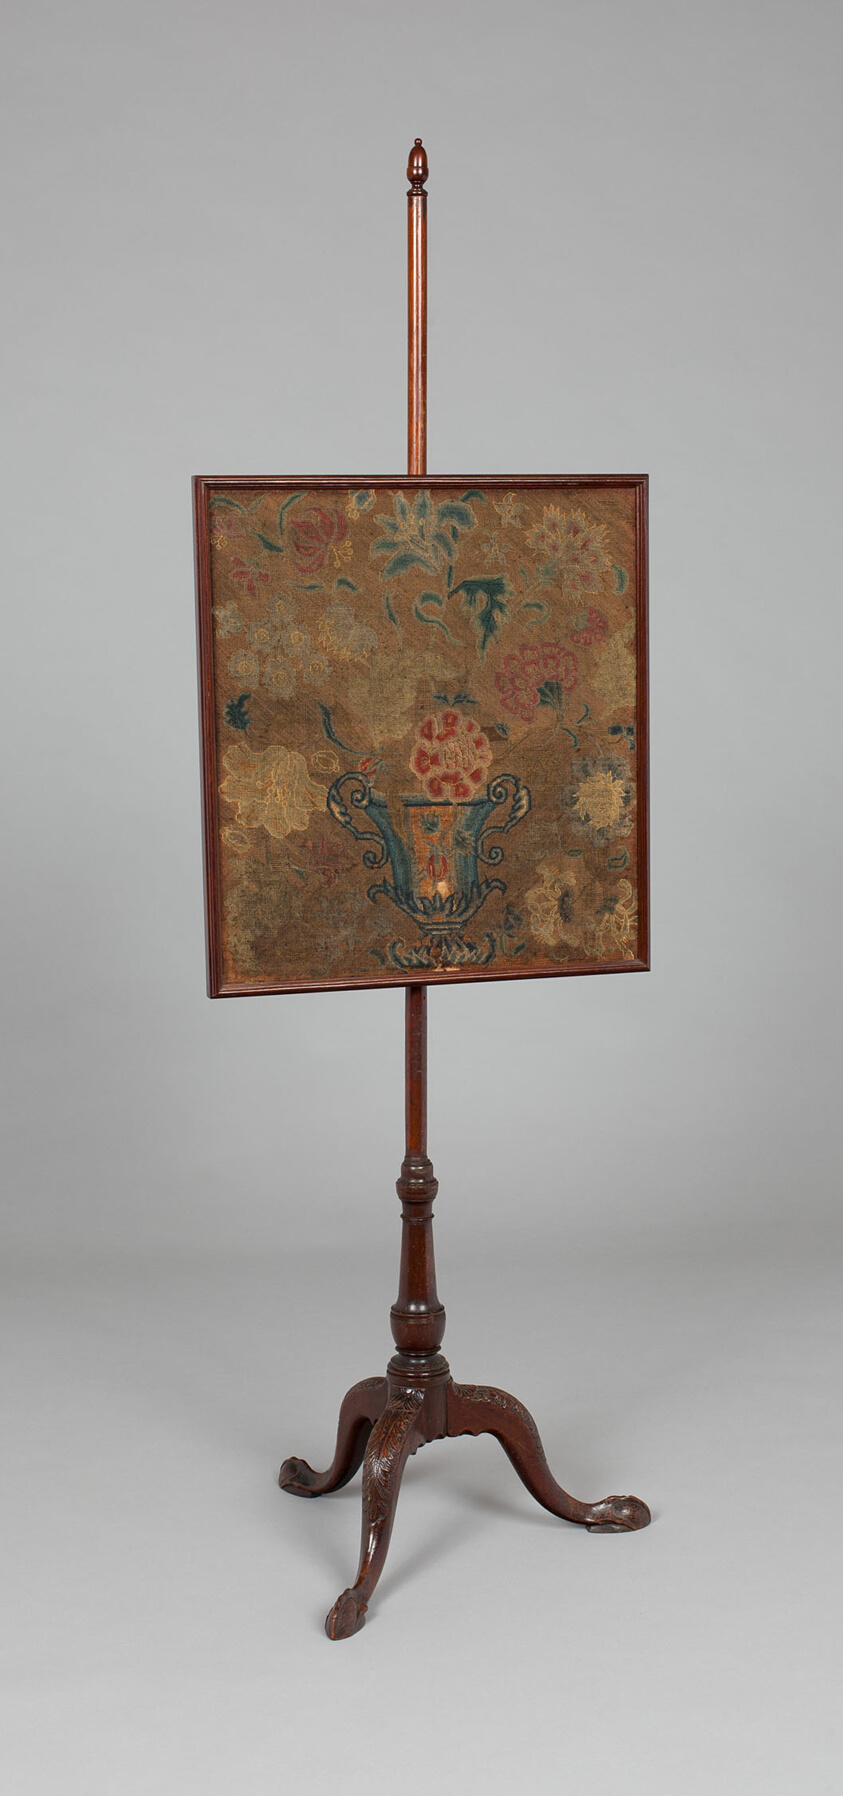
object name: Furniture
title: Fire Screen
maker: Artist unknown (American, 18th century); Eastern Massachusetts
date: 1760–85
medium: Mahogany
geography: Eastern Massachusetts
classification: furniture accessory; american decorative arts; american arts; furniture